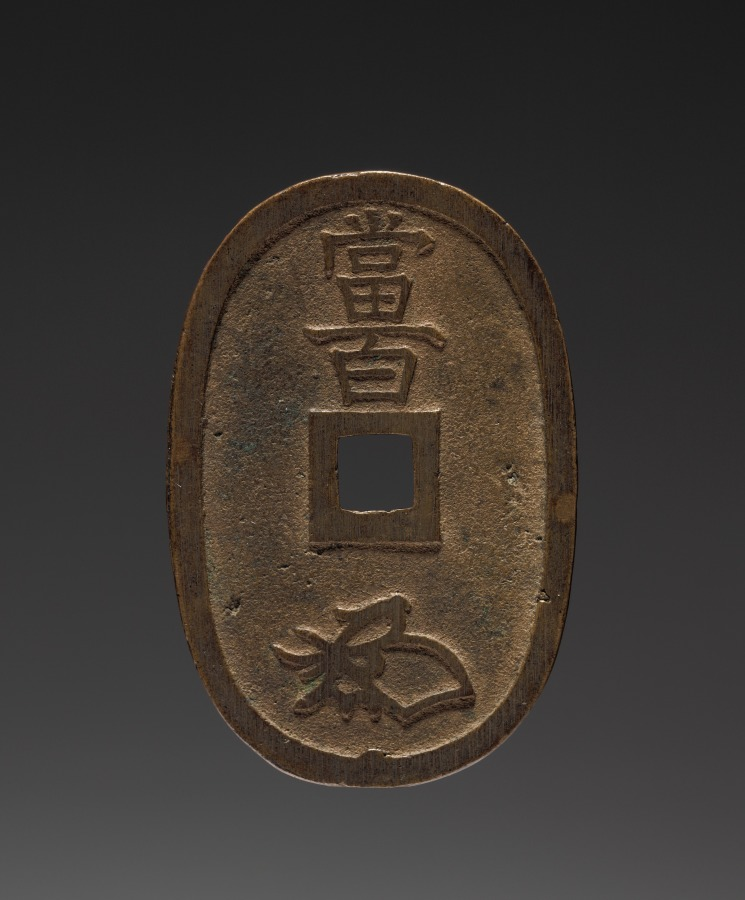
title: Tenpō Tsūhō Coin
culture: Japan, Edo period (1615–1868)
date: 1835–68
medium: copper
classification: Coins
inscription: 天保通寶